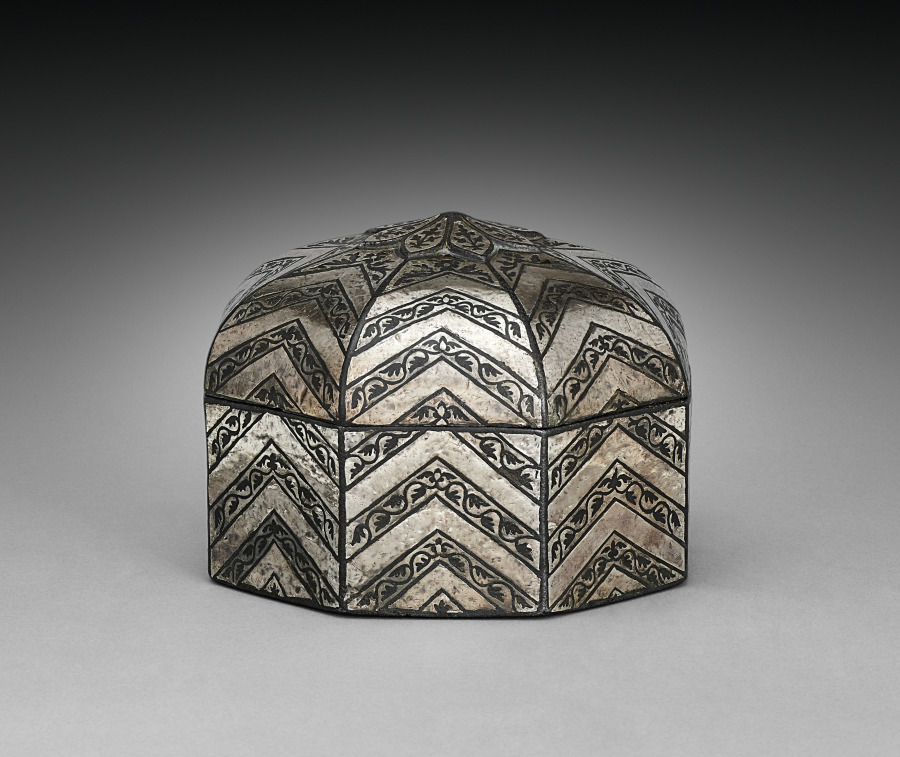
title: Bidri Pandan with Chevrons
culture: Southwestern India, Deccan, Karnataka, Bidar​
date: c. 1700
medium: Zinc alloy with silver overlay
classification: Metalwork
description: A pandan is a lidded vessel for serving paan, which has been enjoyed in India for more than two thousand years. Paan is betel or areca nut mixed with lime powder, aromatics such as clove cinnamon, or cardamom, and wrapped in betel leaf. The whole packet is chewed after a meal as a mild stimulant and mouth freshener.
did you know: The lime powder in paan functioned as an ancient antacid after meals.